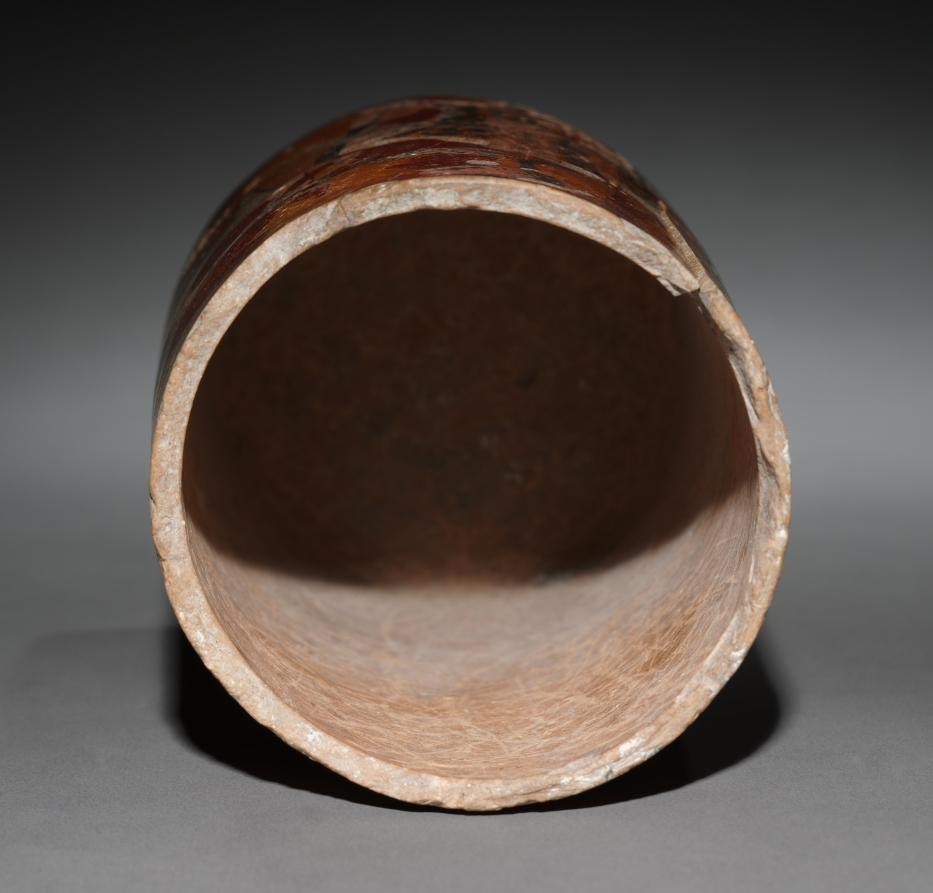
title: Cylindrical Vessel with Palace Scene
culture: Mexico or Central America, Maya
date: 600–900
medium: earthenware with colored slips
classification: Ceramic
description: The scene here may commemorate a special event in the life of a Maya ruler, who stands on a stairway before his throne, his legs framed by a litter on the ground. His gesture and the jaguar pelt at the waist visually unify him with his attendants. The ruler perhaps used the vessel as a drinking cup on important occasions; fine ceramics also served as gifts and as offerings in tombs.